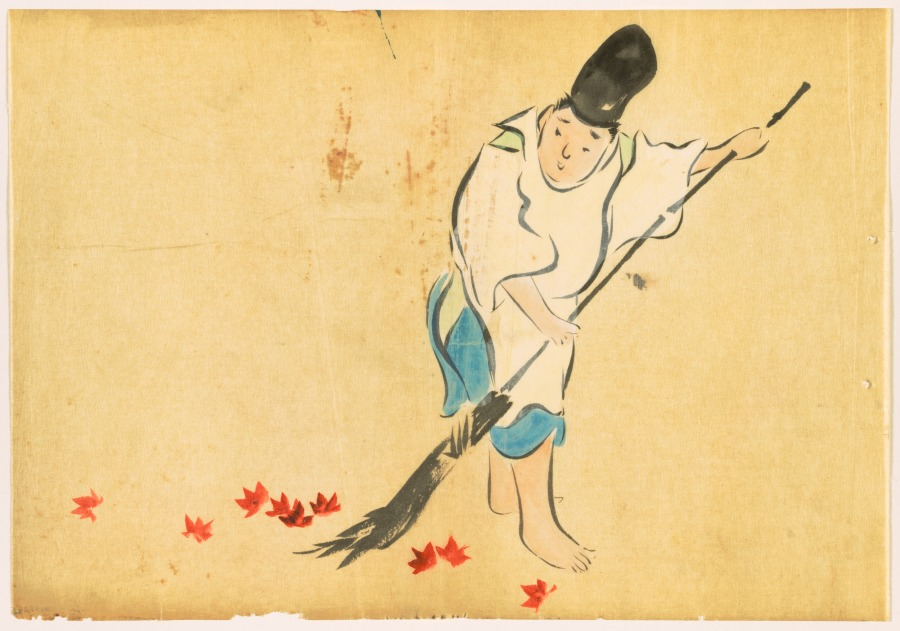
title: Flowers of a Hundred Worlds (Momoyogusa): Court Guard (Eishi)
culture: Japan, Meiji period (1868–1912)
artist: Kamisaka Sekka (Japanese, 1866–1942)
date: 1909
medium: ink and color on paper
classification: Drawing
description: Kamisaka Sekka made preparatory drawings for his Flowers of a Hundred Worlds series on tracing paper with ink and color. The freehand sketches are much looser than the finished, printed compositions.